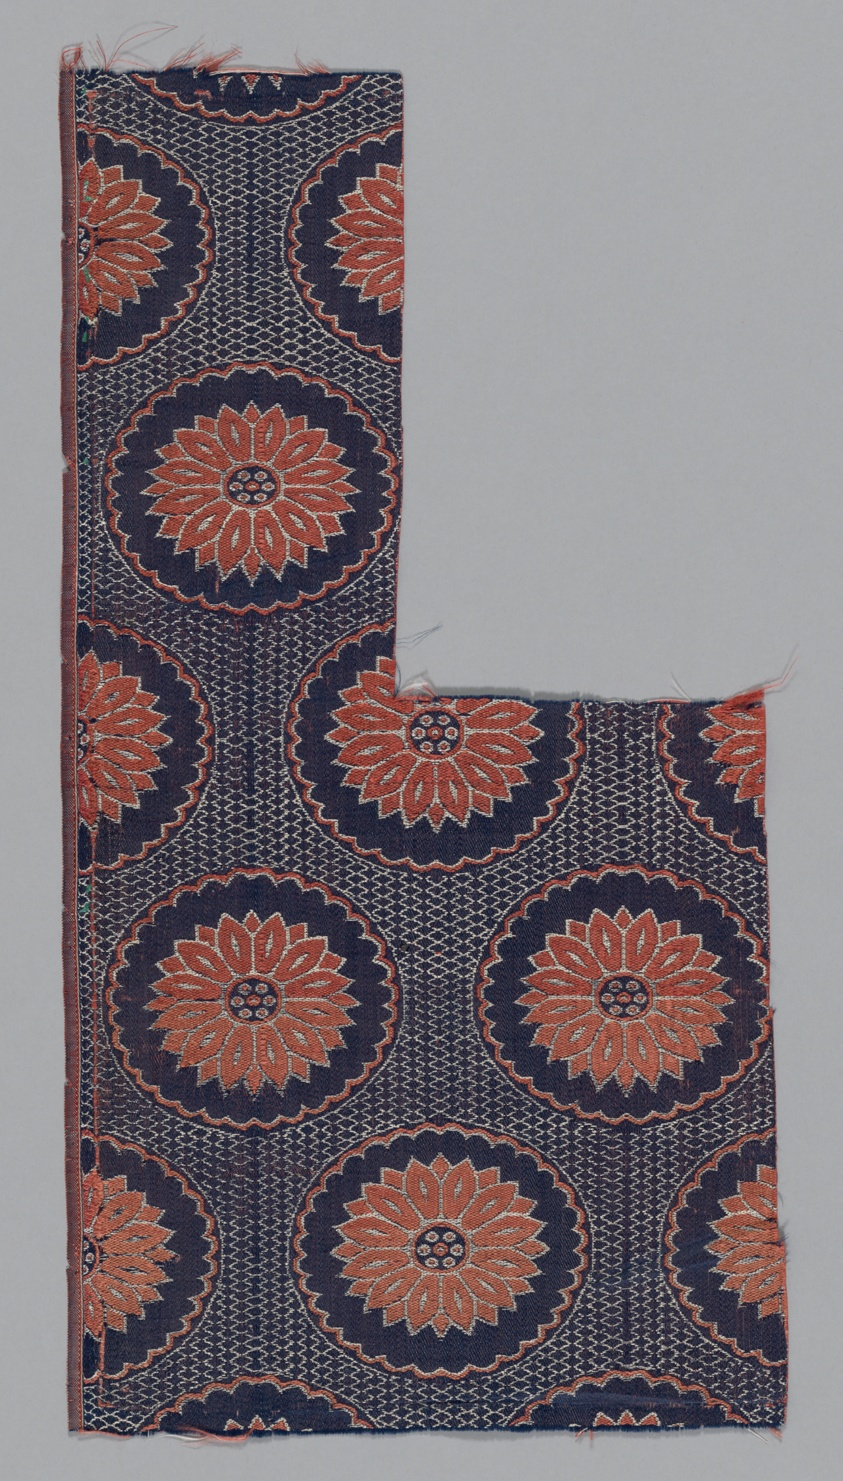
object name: Textile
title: Fragment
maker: China or Japan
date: Edo period (1615–1868), 1775/1825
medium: Fancy compound satin, silk.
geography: China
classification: textile; weaving